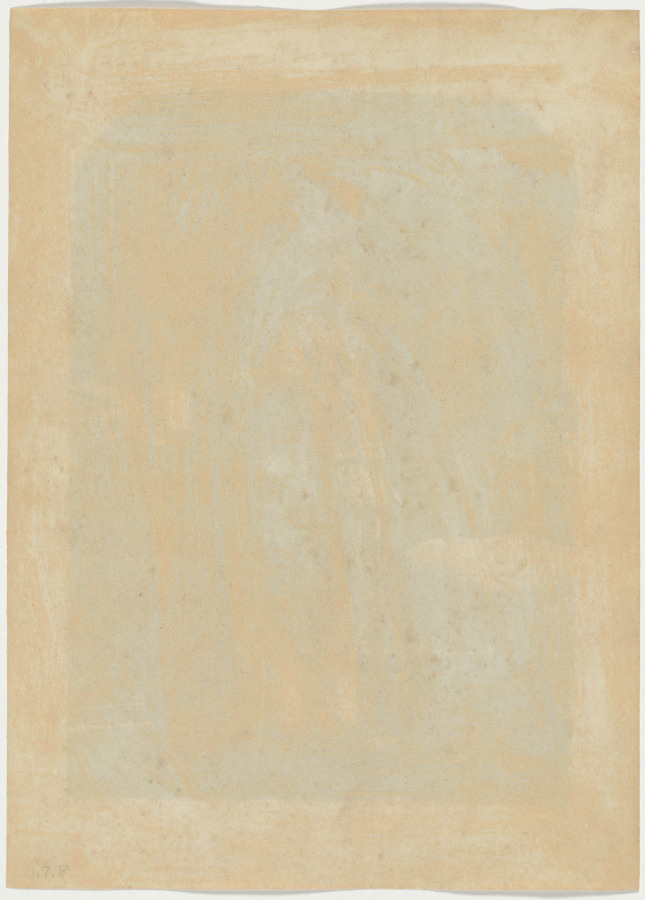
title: His Highness Maharaja Scindia of Gwalior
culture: India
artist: Raja Deen Dayal (Indian, 1844–1905)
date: 1887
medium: albumen print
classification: Photograph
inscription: Stamped in black ink on verso; “3.7.F” Imprinted in white in negative on recto: “2876”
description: Ten-year-old Madho Rao Scindia, the Maharaja of Gwalior (1876–1925; reigned 1886–1925), inherited the throne one year before this photograph was taken. Acceptance of both Indian and British cultural influences can be seen in the contrast of his garb, which is Indian from turban to shoe, with the Western-style furniture, clock, and books. Reflected in the glass balls on the table, which may be an inkwell or perfume jar, are the other people in the room during the shot. The person on the left in the top ball may be the photographer, Lala Deen Dayal.